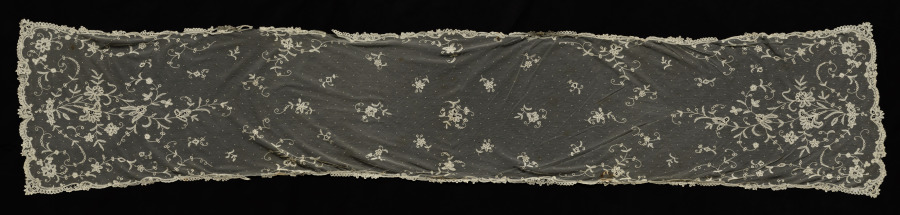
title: Lace Scarf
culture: Belgium, Brussels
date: 1800s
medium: Machine-made lace net: linen bobbin lace appliqué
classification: Lace